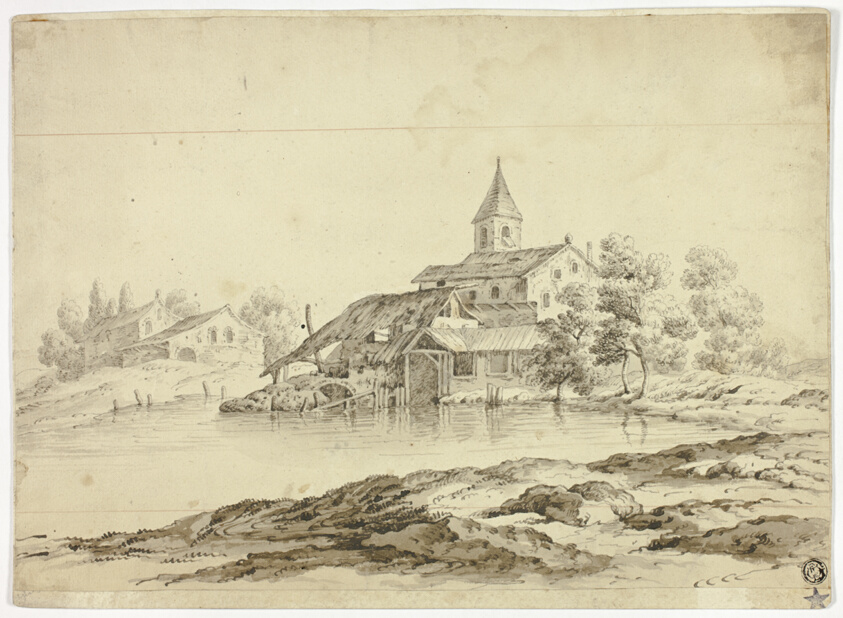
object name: Drawing and Watercolor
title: Watermill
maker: Jan van Everdingen (Dutch, d. 1656)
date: 1600/56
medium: Pen and brown, with brush and brown wash, on cream laid paper, laid down on ivory wove paper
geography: Holland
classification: pen and ink drawings; drawings (visual works); prints and drawing